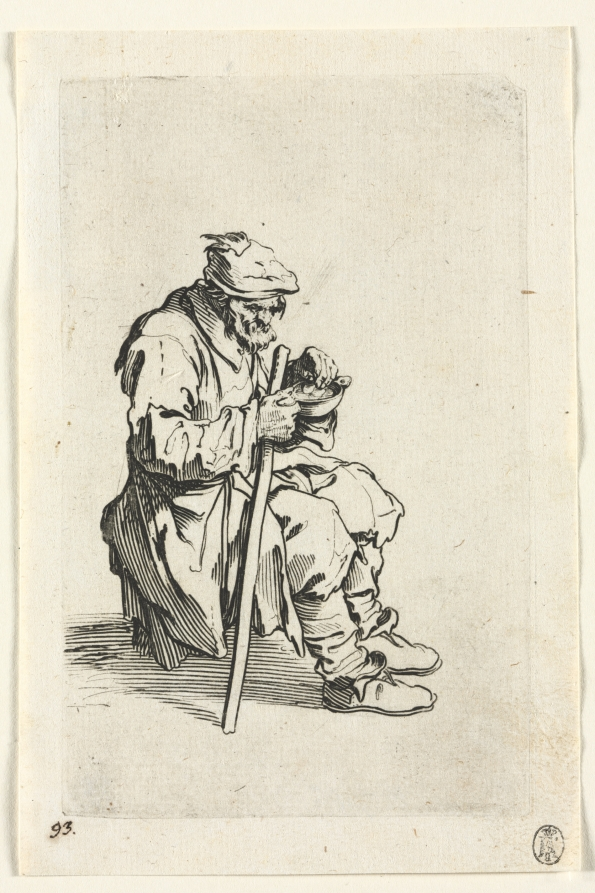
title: The Beggars: Beggar Sitting Down and Eating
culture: France, 17th century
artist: Jacques Callot (French, 1592–1635)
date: ca. 1623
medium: etching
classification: Print